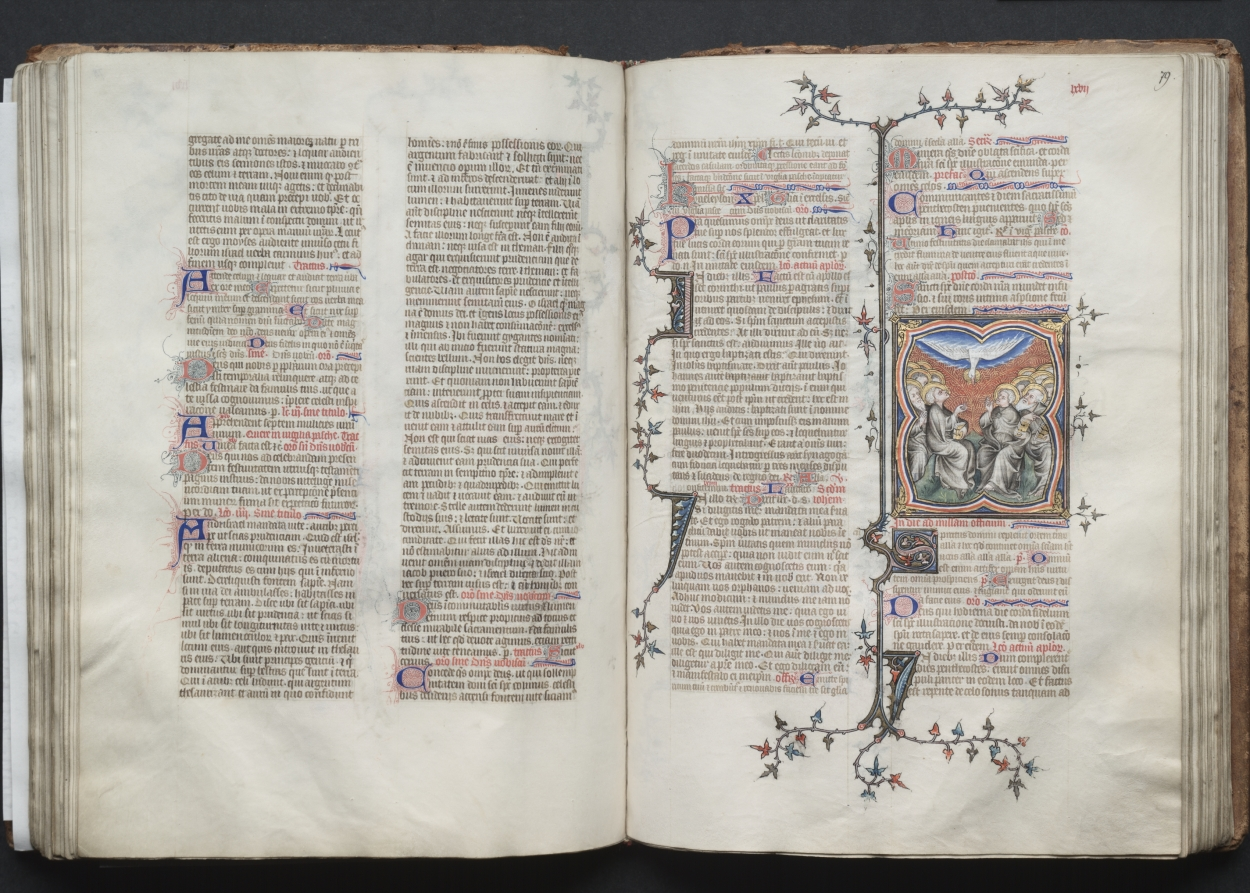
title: The Gotha Missal: Fol 79r, The Pentecost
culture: France, Paris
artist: Master of the Boqueteaux (French)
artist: and Workshop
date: c. 1375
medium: ink, tempera, and gold on vellum; blind-tooled leather binding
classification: Bound Volume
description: The style and quality of this manuscript's decoration is typical of deluxe Parisian books made for aristocratic or royal patrons. Most of the book's decoration appears to be the work of the Master of the Boqueteaux, an artist active at the court of King Charles V (died 1380). His style was apparently shared by a number of book illuminators working in and around Paris. It is very possible that the Gotha Missal belonged to Charles V, but is not provable because the manuscript has no royal portraits and lacks a colophon. Given the book's magnificent decoration, however, it would seem that it was produced for a Valois prince, if not for the king himself. The manuscript receives its name from the German dukes of Gotha, its later owners.